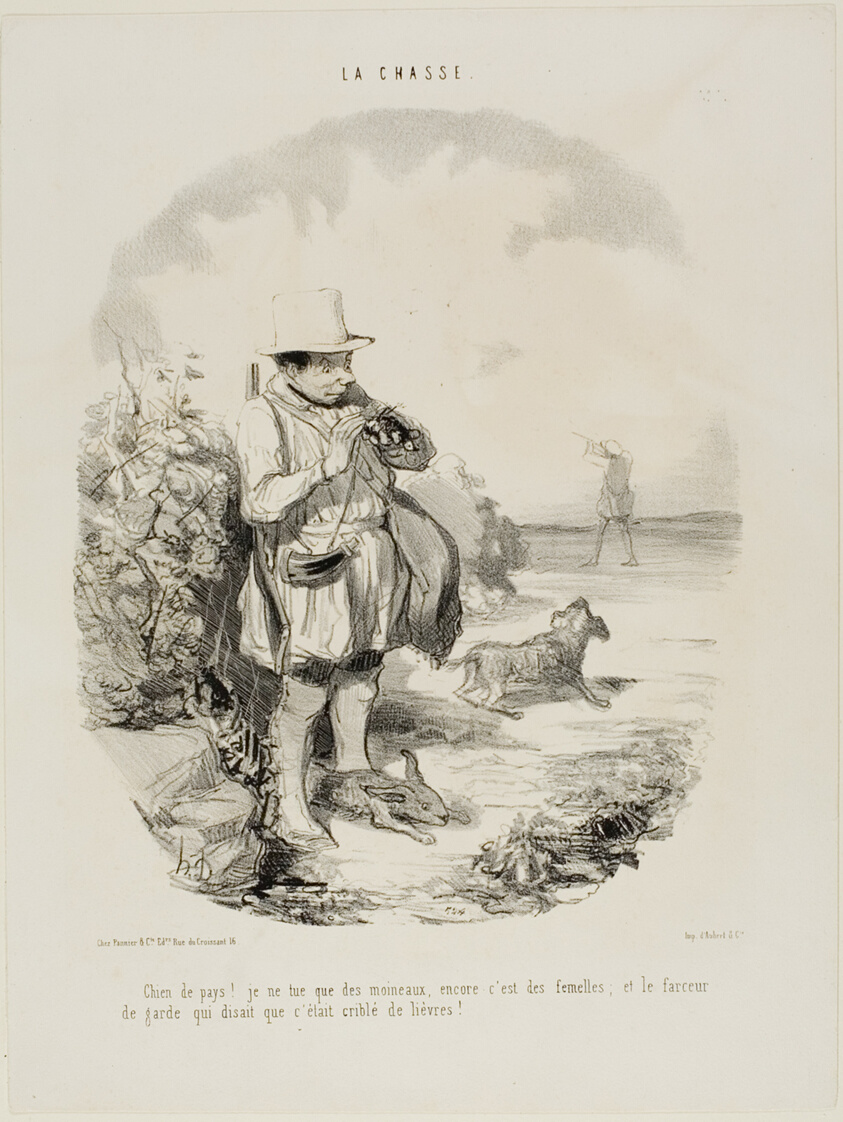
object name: Print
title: “Damn country! I only shoot sparrows.... and just females... and this ingenious guard insisted the place is full of rabbits,” plate 5 from La Chasse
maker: Honoré Victorin Daumier; French, 1808-1879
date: 1843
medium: Lithograph in black on white wove paper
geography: France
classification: lithograph; print; prints and drawing